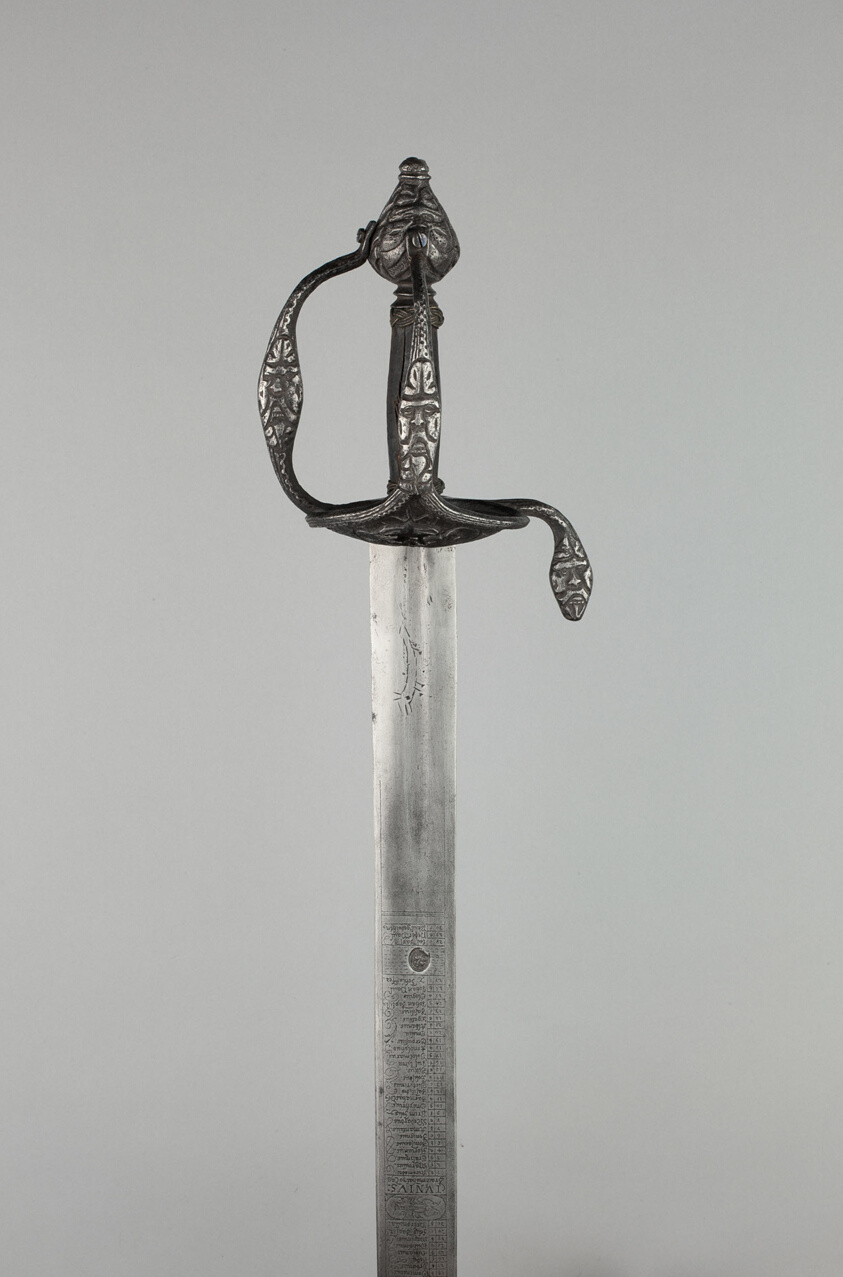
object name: Arms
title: Cavalry Sword with Calendar Blade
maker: German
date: mid–17th century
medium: Steel, wood, and brass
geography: Germany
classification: edged weapon-sword; arms; arms and armor